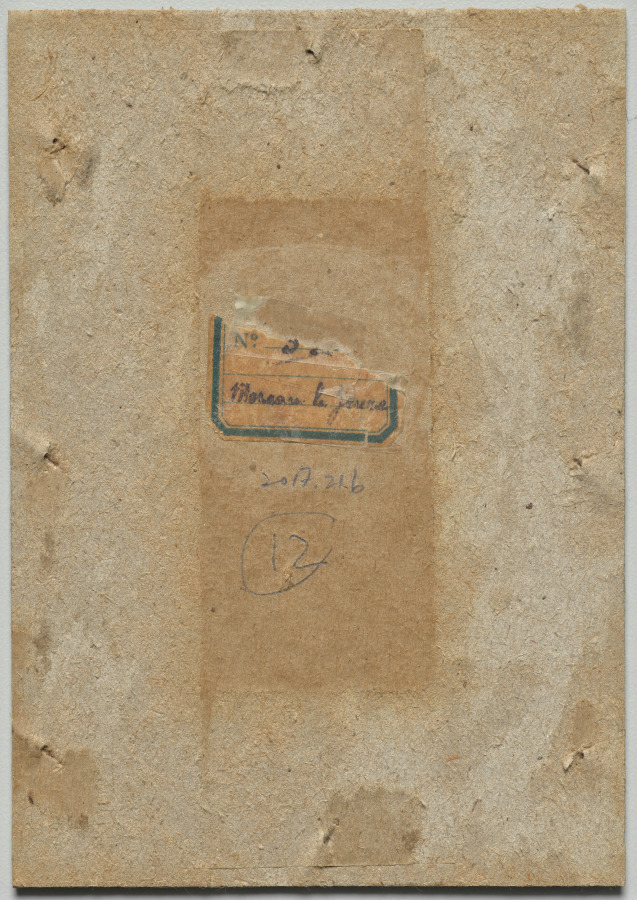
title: Three Figures with a Dog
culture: France, 18th century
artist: Jean-Michel the Younger Moreau (French, 1741–1814)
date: probably 1800s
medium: Pen and black ink with brown and gray washes and traces of white gouache (brim of standing man’s hat)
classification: Drawing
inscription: verso, center, in graphite: Moreau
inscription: verso of backing, lower center, encircled and written in graphite: 12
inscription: partial sticker on verso of backing, in blue ink: No (torn off) / Moreau le jeune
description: An accomplished draftsman in eighteenth-century France, Moreau the Younger produced numerous designs for book illustrations of which this may be an example. In this scene a woman directs the hand of a man as he writes. Raising her left hand, she gestures to the solider to remain at a distance while the small dog reacts to this peculiar encounter.